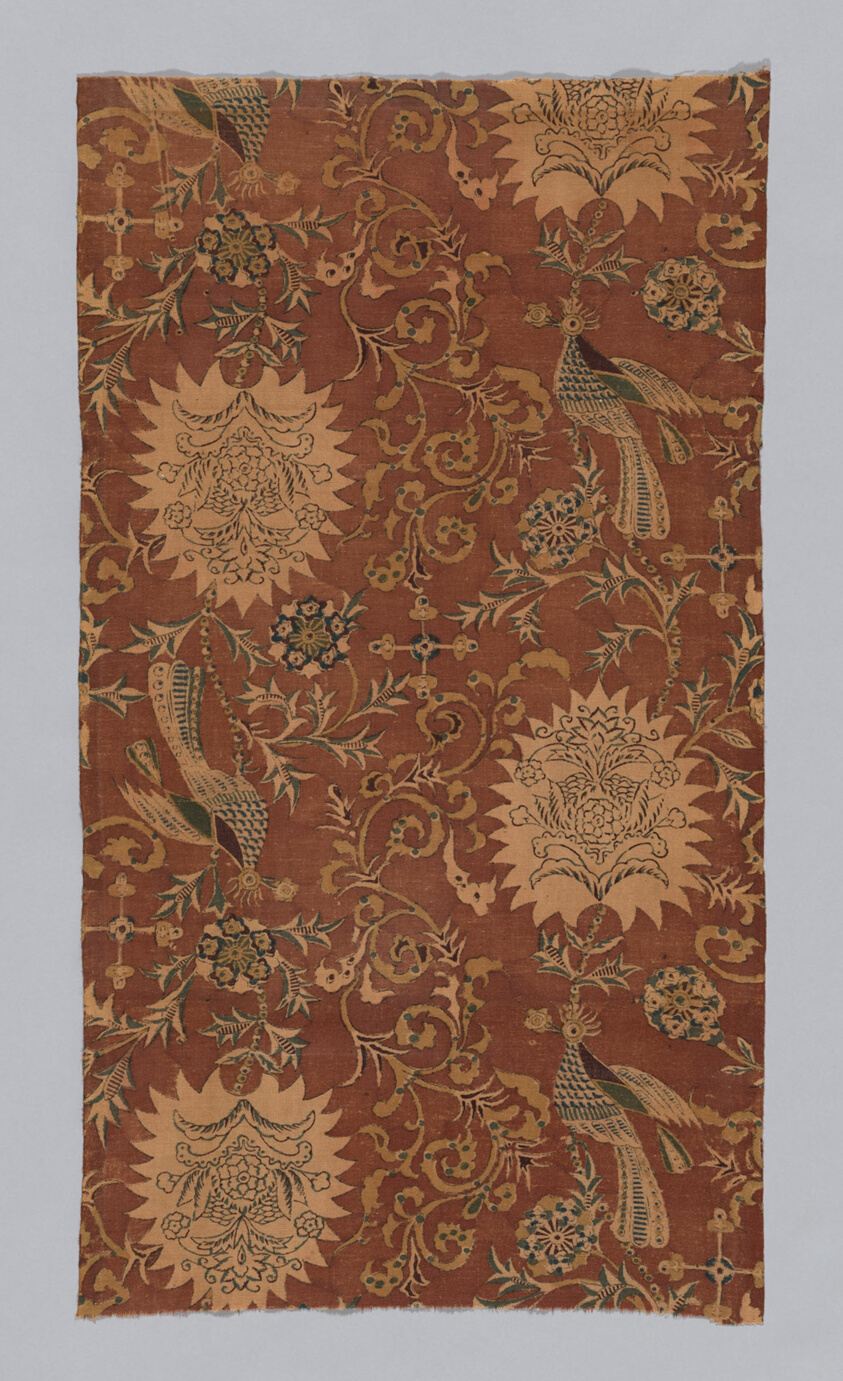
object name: Textile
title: Sarasa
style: edo (japanese period)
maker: Japan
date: Edo period (1615–1868), probably 18th century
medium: Cotton, plain weave; stenciled; mordant-dyed; painted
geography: Japan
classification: textile; weaving - printed